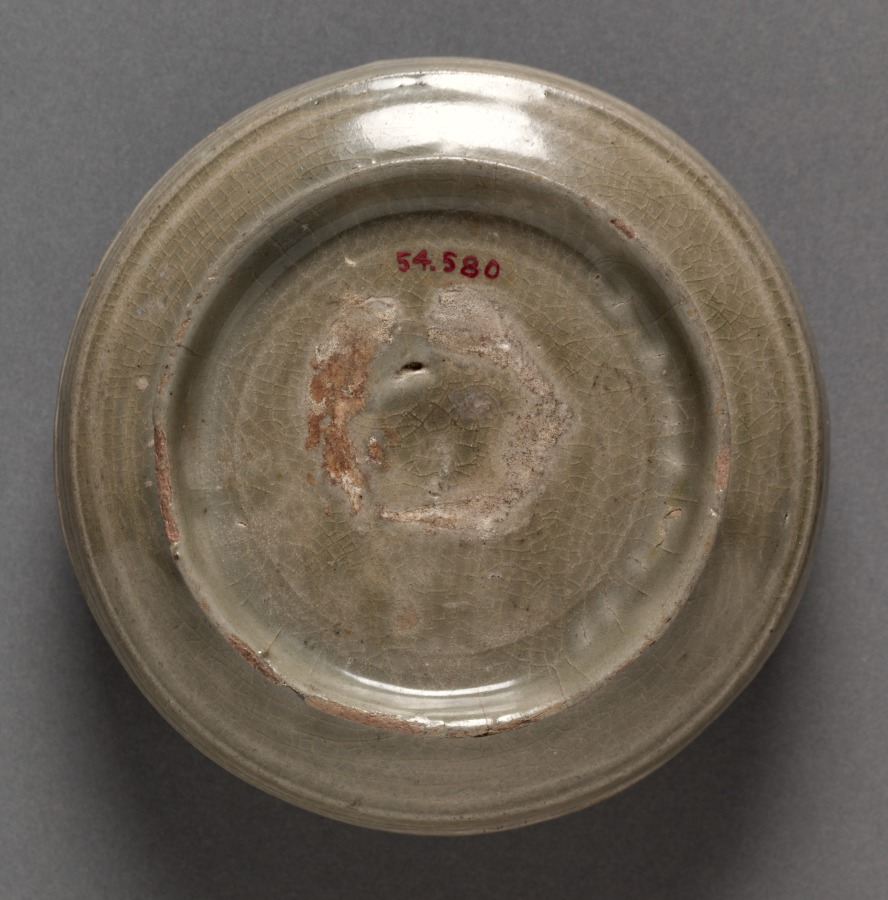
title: Box: Yue ware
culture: China, Zhejiang province, Song dynasty (960-1279)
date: 960–1279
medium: glazed stoneware with incised decoration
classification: Ceramic